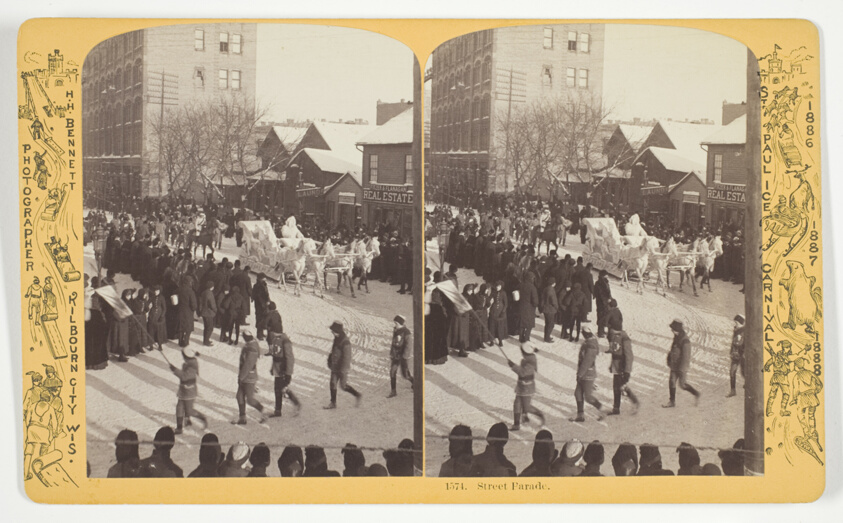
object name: Photograph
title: Street Parade, No. 1574 from the series "St. Paul Ice Carnival"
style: 19th century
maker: Henry Hamilton Bennett (American, born Canada, 1843-1908)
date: 1886/88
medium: Albumen print, stereo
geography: Wisconsin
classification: photography; photograph; albumen silver print; stereograph (albumen)